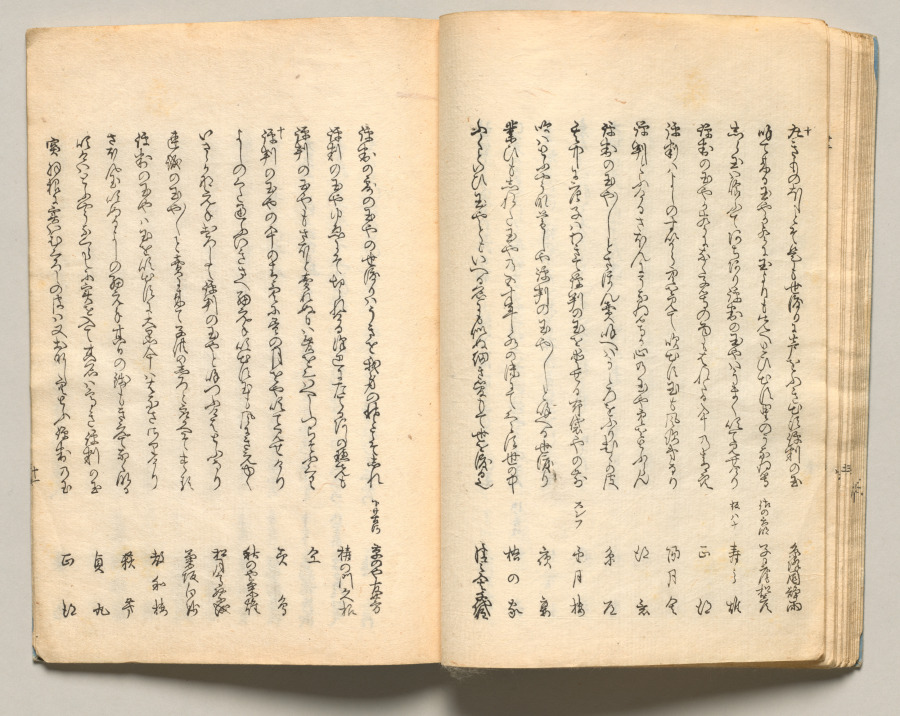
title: Spread Eighteen from Volume Three of People of Japan in Light Verse (Kyōka)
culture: Japan, Edo period (1615–1868)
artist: Utagawa Hiroshige (Japanese, 1797–1858)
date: 1857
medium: Woodblock-printed book; ink and color on paper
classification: Bound Volume